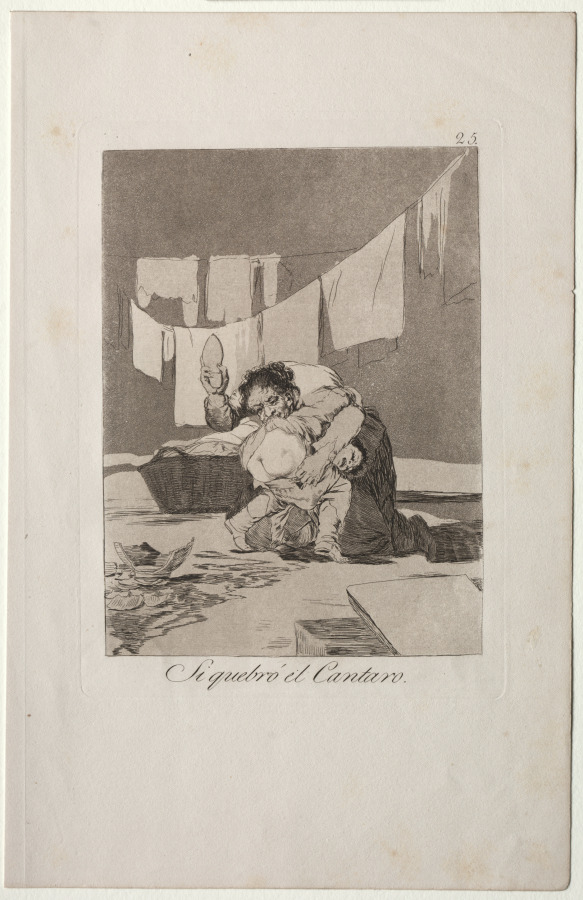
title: Yes, He Broke the Pot, Plate 25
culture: Spain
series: Los Caprichos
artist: Francisco de Goya (Spanish, 1746–1828)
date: 1799, printed c. 1855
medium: etching and aquatint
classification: Print